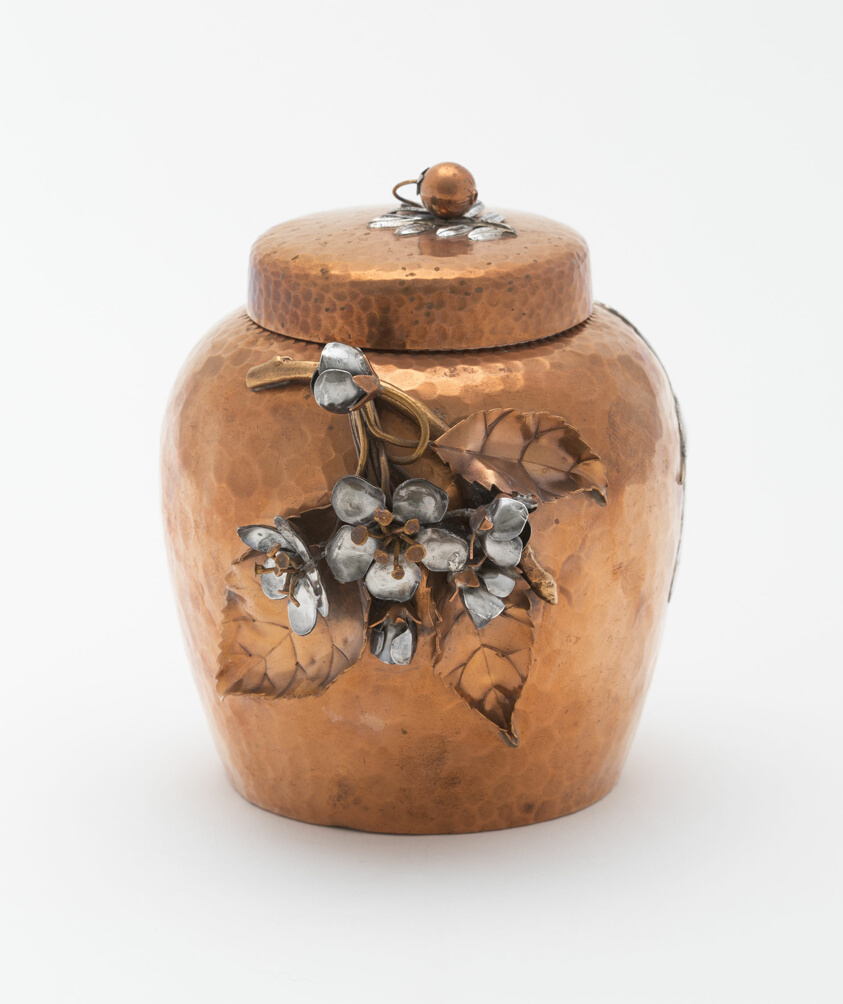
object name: Metalwork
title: Tea Cannister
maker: Gorham Manufacturing Company (American, founded 1831); Providence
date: 1881–95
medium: Copper, with silver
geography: Providence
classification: teaware; container; metalwork; american decorative arts; american arts; decorative arts